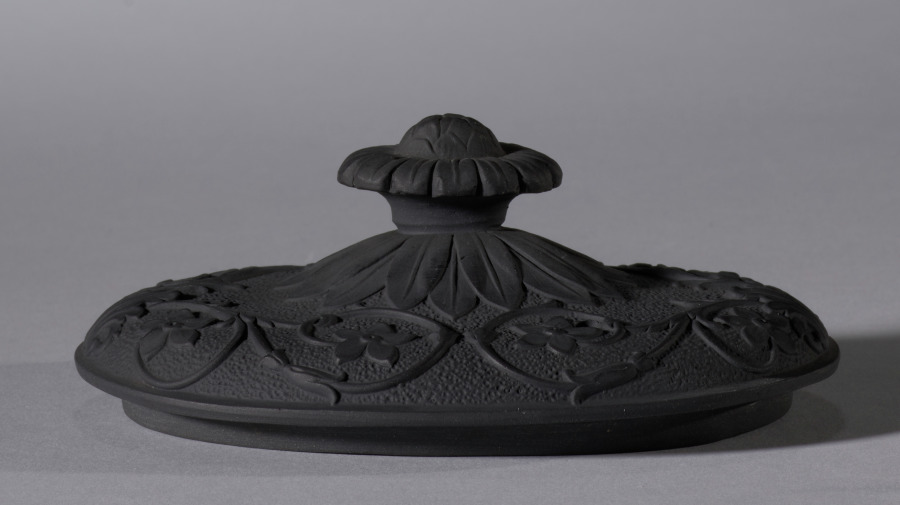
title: Teapot (cover)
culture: England, 19th century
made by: Elijah Mayer (British, c. 1770–1805)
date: c. 1810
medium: black basalt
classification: Ceramic